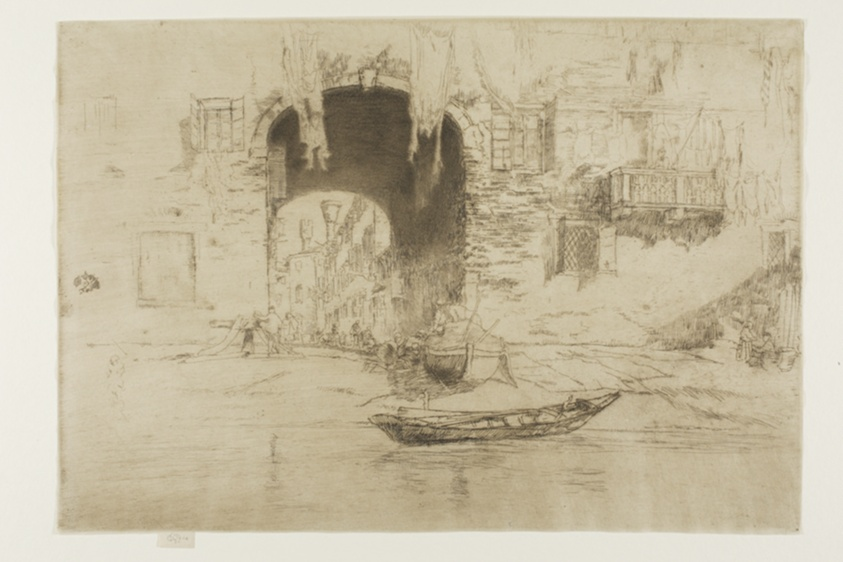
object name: Print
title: San Biagio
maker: James McNeill Whistler (American, 1834-1903)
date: 1880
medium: Etching and drypoint with foul biting in dark brown ink on ivory Asian laid paper altered to tan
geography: United States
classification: etching; drypoint; print; prints and drawing; foul biting; paper